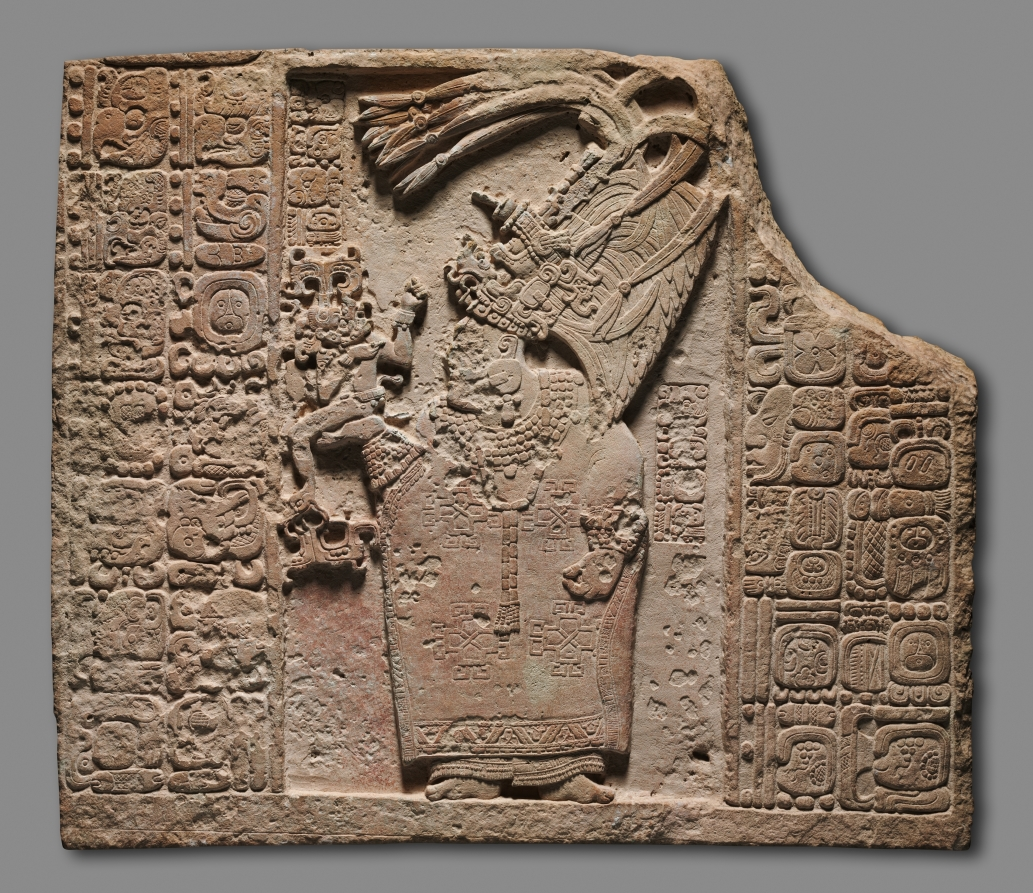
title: Panel with Royal Woman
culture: Guatemala or Mexico, Usumacinta River region, Maya style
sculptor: K’in Lakam Chahk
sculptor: and Jun Nat Omootz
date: c. 795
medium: limestone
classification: Sculpture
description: In this panel, probably from a palace interior, the woman’s static posture contrasts with the liveliness of the creature she holds, a god of royalty with a serpent leg and a grotesque head with a smoking torch on its brow. (The same deity is shown in the nearby Eccentric Flint.) Other signs of high rank are her jade jewelry and costume, its beauty suggesting that textiles and featherwork were great Maya arts, now lost to a tropical climate. The hieroglyphics refer to an undefined ritual that the woman completed in 795.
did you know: This panel, likely from a palace interior, depicts a royal Maya woman.